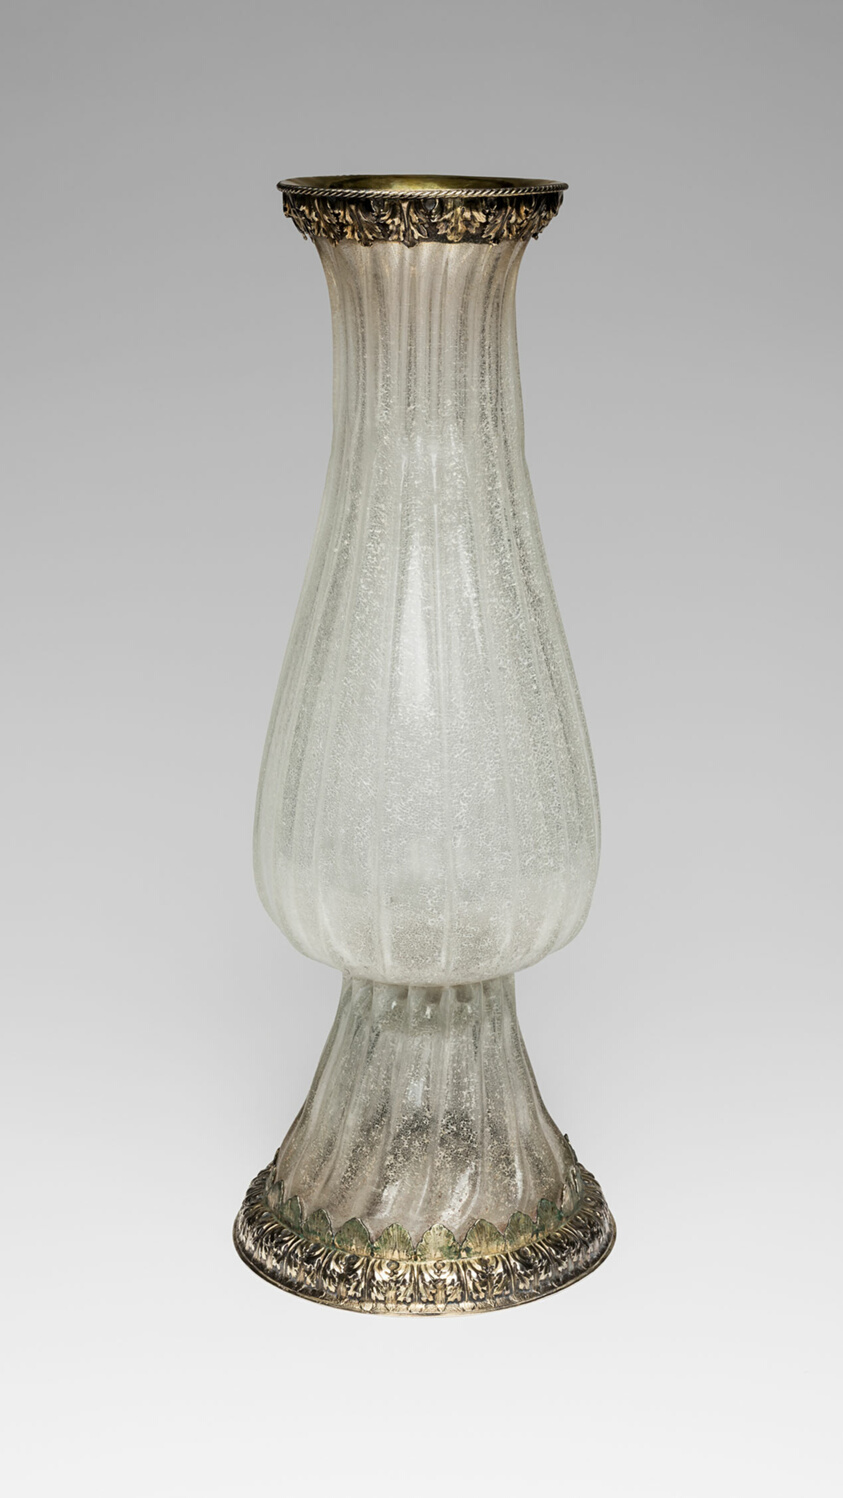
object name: Glass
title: Vase (One of a Pair)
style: Baroque, 17th Century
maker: Northern Netherlands; Mounts possibly English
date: c. 1675–c. 1685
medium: Glass and gilt silver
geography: Northern Netherlands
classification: vase; glass; decorative arts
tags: vases, vessels, display, garnitures